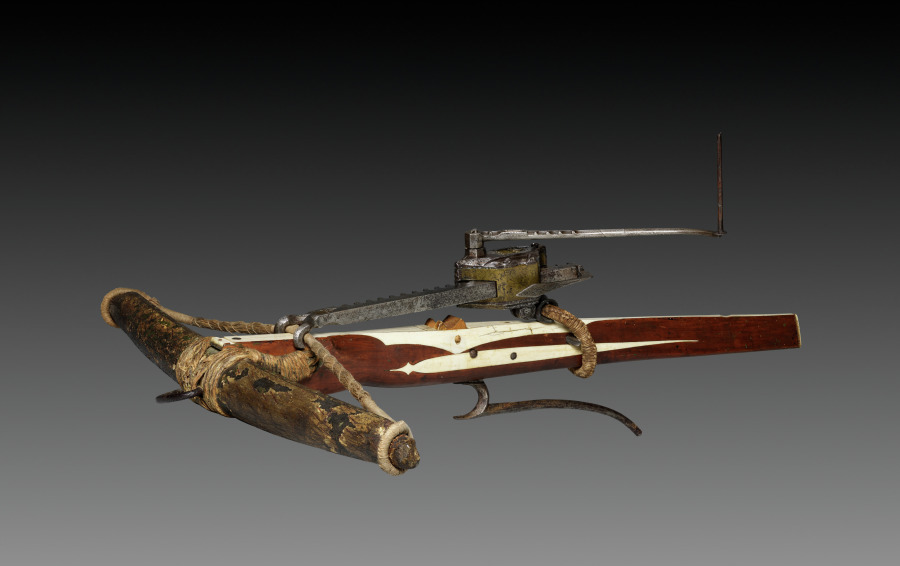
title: Cranequin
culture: France(?)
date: c. 1480–1500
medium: steel and brass; incised decoration; pierced traceried Gothic windows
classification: Arms and Armor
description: Bows made of composite materials were developed during the 1400s. They were immensely powerful and could be spanned only with the aid of a winder called a cranequin like the one seen here.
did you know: The mark, made of inlaid copper, is currently unidentified.